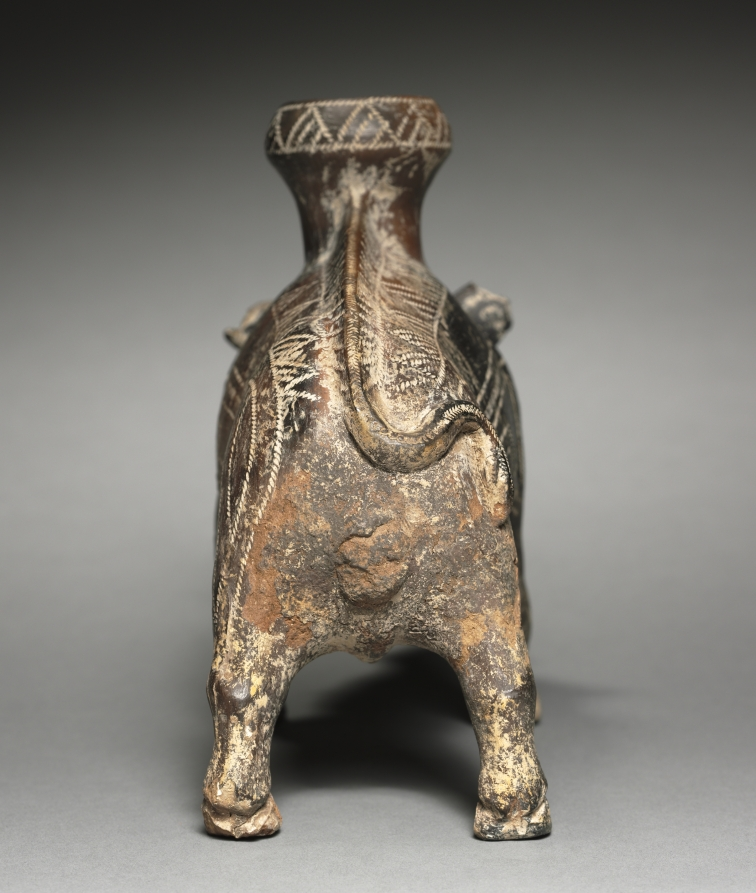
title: Vessel in the Shape of a Wild Boar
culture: Italy, Etruscan or modern forgery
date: 700–500 BCE or 1900s CE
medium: terracotta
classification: Ceramic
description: Wild boars were a favorite motif in classical antiquity, but this vessel has long puzzled scholars. Its brown, burnished surface, with incised geometric decoration, recalls Etruscan impasto pottery from as early as the seventh century BC. The naturalistic shape of the boar, however, resembles terracotta vessels made in the fifth century BC or later. Recent scientific analysis suggests that this vessel may have been made in the 20th century, and our curators and conservators are continuing their research.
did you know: This boar enjoyed brief internet fame, with a series of online memes peaking in 2018.